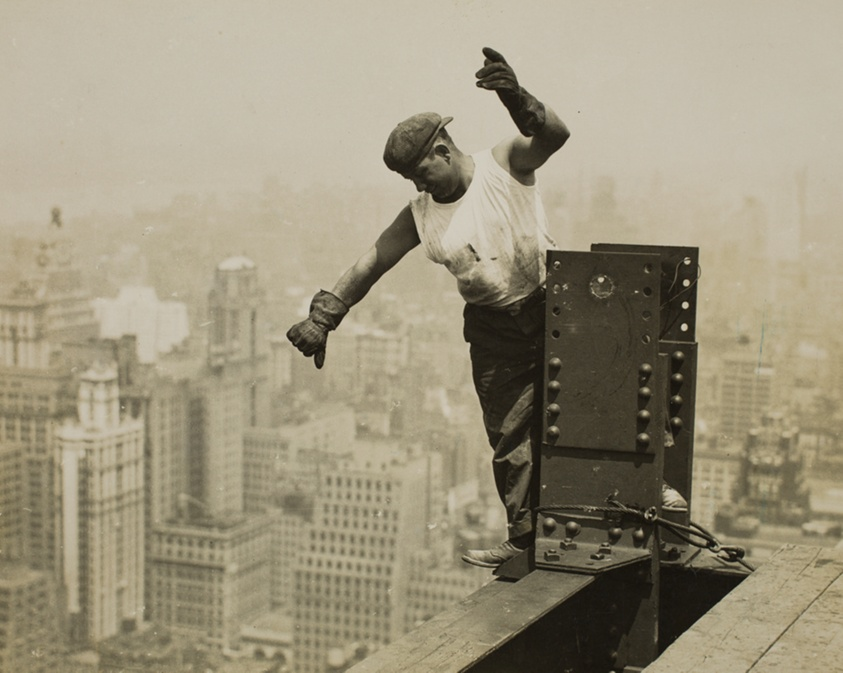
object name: Photograph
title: Worker Giving High-Signal to the Derrick Crew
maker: Lewis Wickes Hine (American, 1874–1940)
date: 1930/31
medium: Gelatin silver print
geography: United States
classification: photograph; photography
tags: documentary